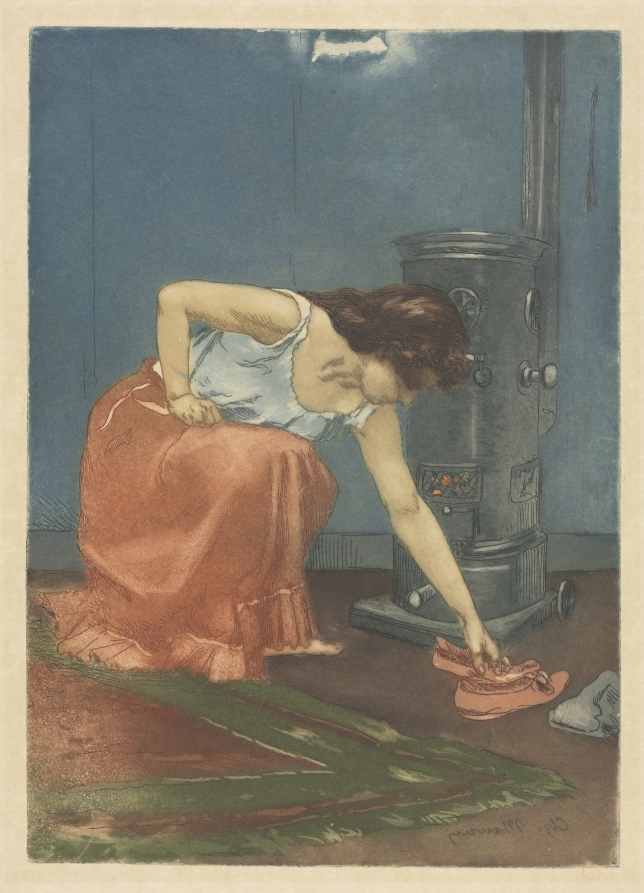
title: The Slippers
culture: France, 19th century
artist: Charles Maurin (French, 1856–1914)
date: c. 1880–1914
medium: color etching and aquatint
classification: Print